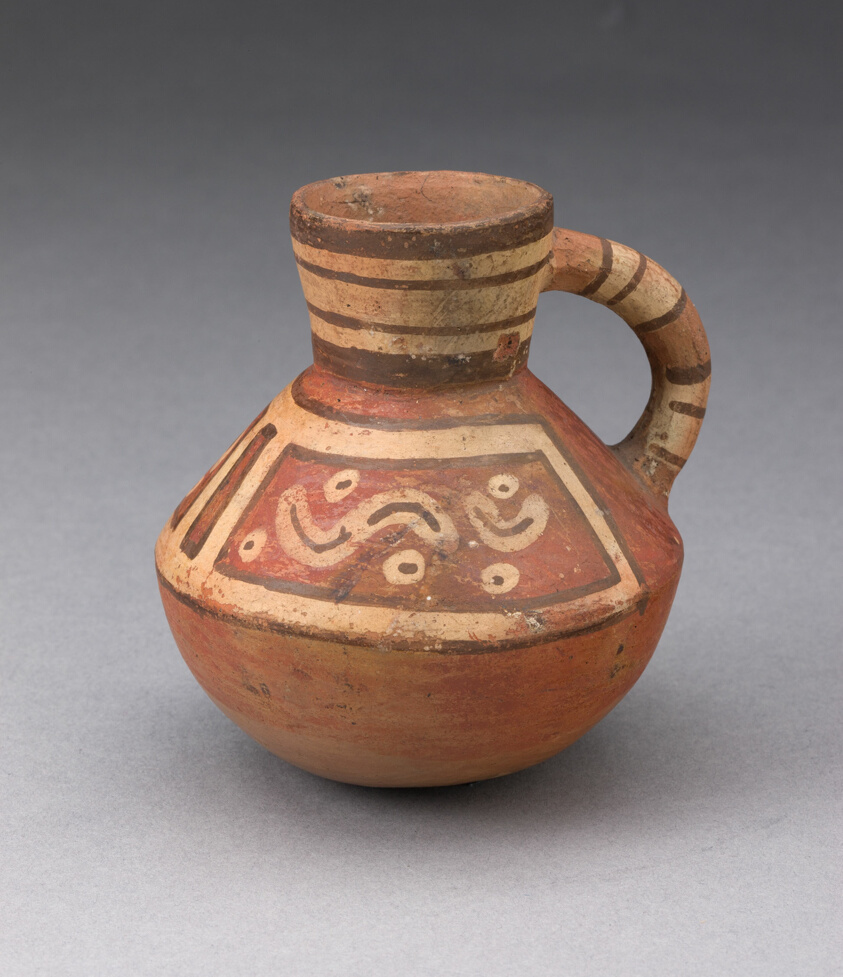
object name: Vessel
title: Miniature Handled Bottle with Abstract Motifs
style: nazca, early intermediate period, Pre-Columbian, americas, ica, late intermediate period, Arts of the Americas, andean, andes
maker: Tiwanaku-Wari; South Coast, Peru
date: 600–1000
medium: Ceramic and pigment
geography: Peruvian South Coast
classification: earthenware; ceramics; vessel; art of the americas